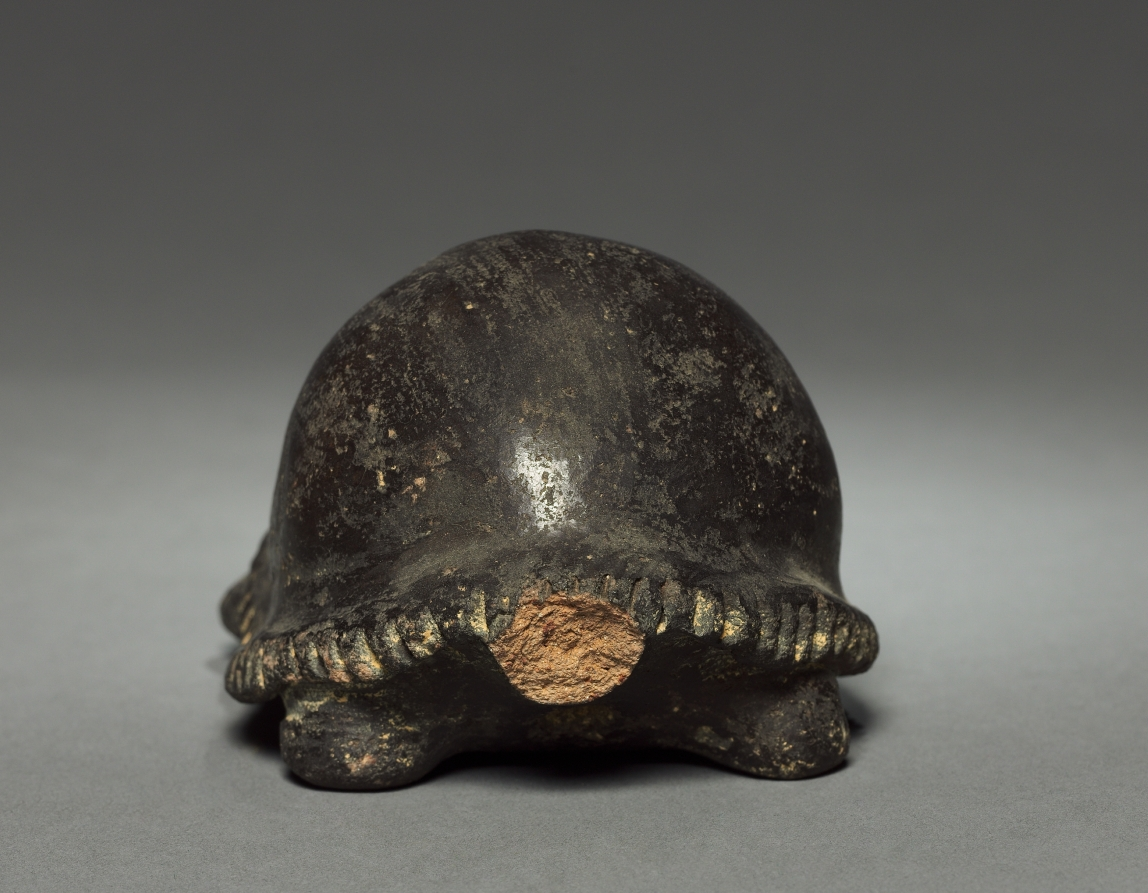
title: Turtle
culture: Colombia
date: before 1921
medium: pottery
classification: Ceramic